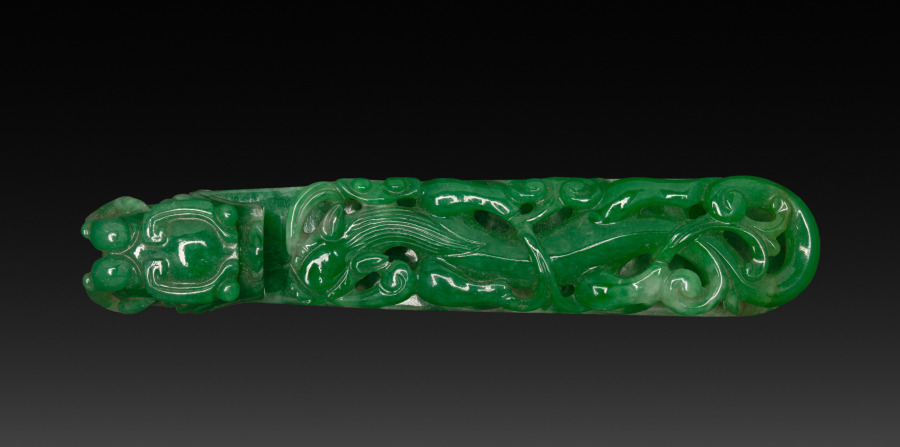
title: Belt Buckle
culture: China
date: 1800s–1900s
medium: jade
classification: Jewelry